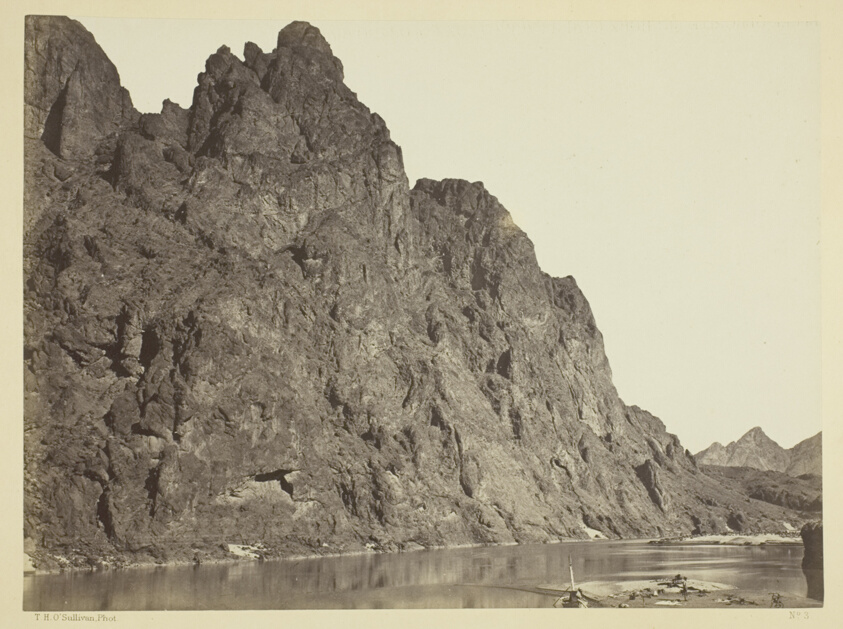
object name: Photograph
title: Bluff Opposite Big Horn Camp, Black Cañon, Colorado River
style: 19th century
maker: Timothy O'Sullivan (American, born Ireland, 1840–1882)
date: 1871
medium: Albumen print, from the album "Geographical & Geological Explorations & Surveys West of the 100th Meridian," vol. 1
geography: United States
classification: albumen silver print; photographic process; photography; photograph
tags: Collected by Hugh Edwards